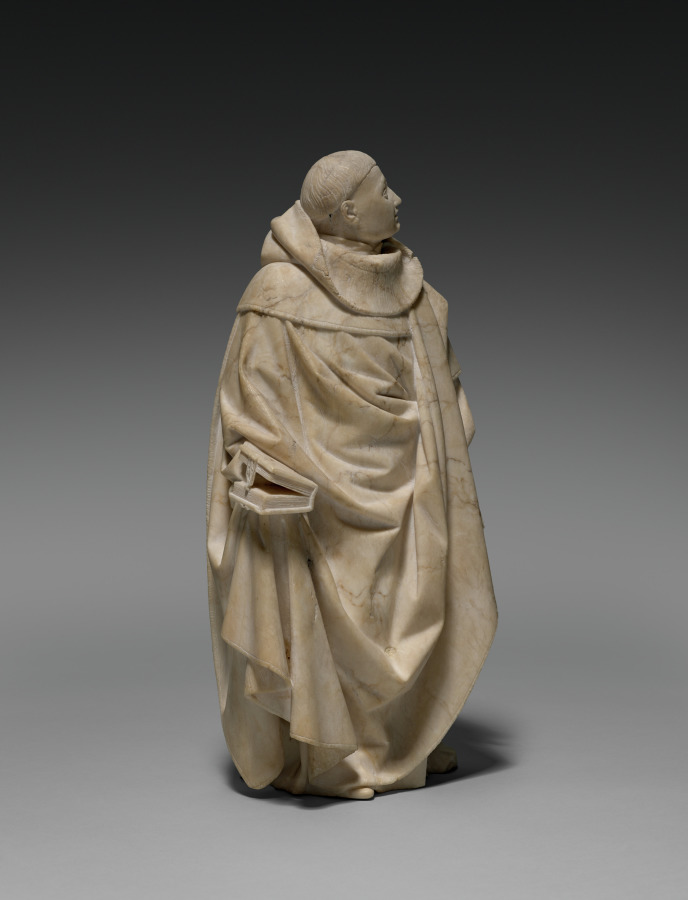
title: Mourner from the Tomb of John the Fearless and Margaret of Bavaria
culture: Spanish, Burgundy, Dijon, 15th century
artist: Jean de la Huerta (Spanish, active Burgundy, 1431–62)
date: 1443–45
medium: salins alabaster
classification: Sculpture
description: This monklike figure has a variously textured monochrome surface. Alabaster’s softness made it easy to carve details like the fabric and fur of the mourner’s robe and the codex pages in his hand. This is one of 40 mourners from an elaborate funeral procession beneath an intricately carved alabaster arcade. This mourner comes from the monastery of Champmol near Dijon, which became a primary burial place for Burgundian dukes. The sculpture was part of the tomb of John the Fearless (1371–1419), commissioned by his son Philip the Good (1396–1467), modeled after the earlier monument for Philip the Bold.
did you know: A plaster cast of this mourner adorns the Tomb of John the Fearless and Margaret of Bavaria in Dijon, France.